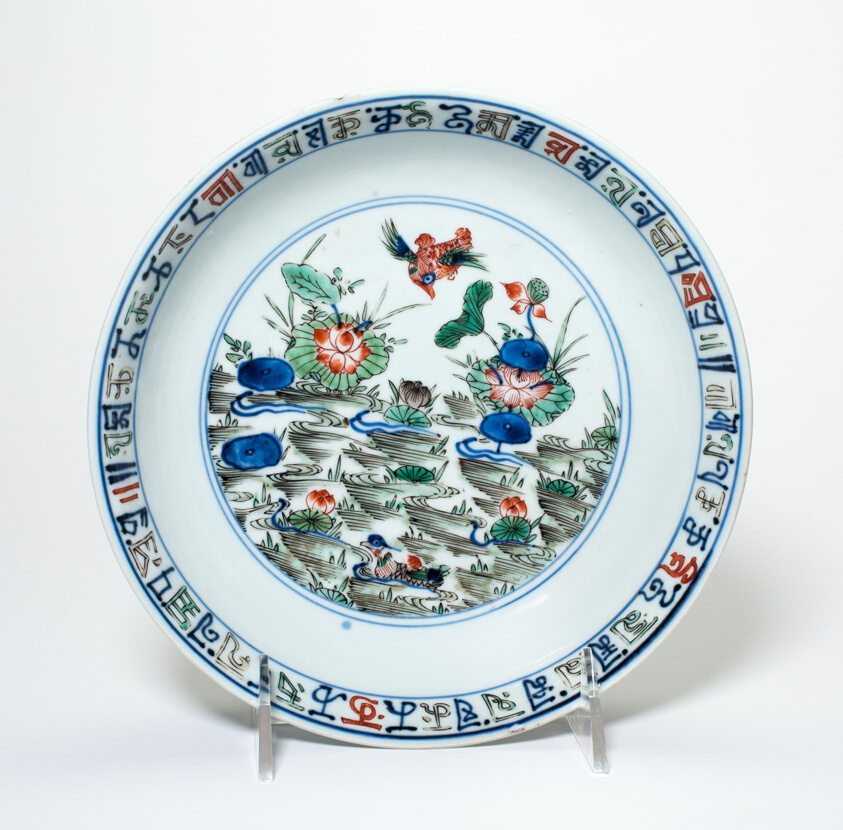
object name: Vessel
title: Dish with Bird and Duck by Lotus Pond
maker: China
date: Qing dynasty (1644–1911)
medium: Porcelain painted in underglaze blue and overglaze polychrome (red and green) enamels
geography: China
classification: porcelain; asian art; ceramics; vessel